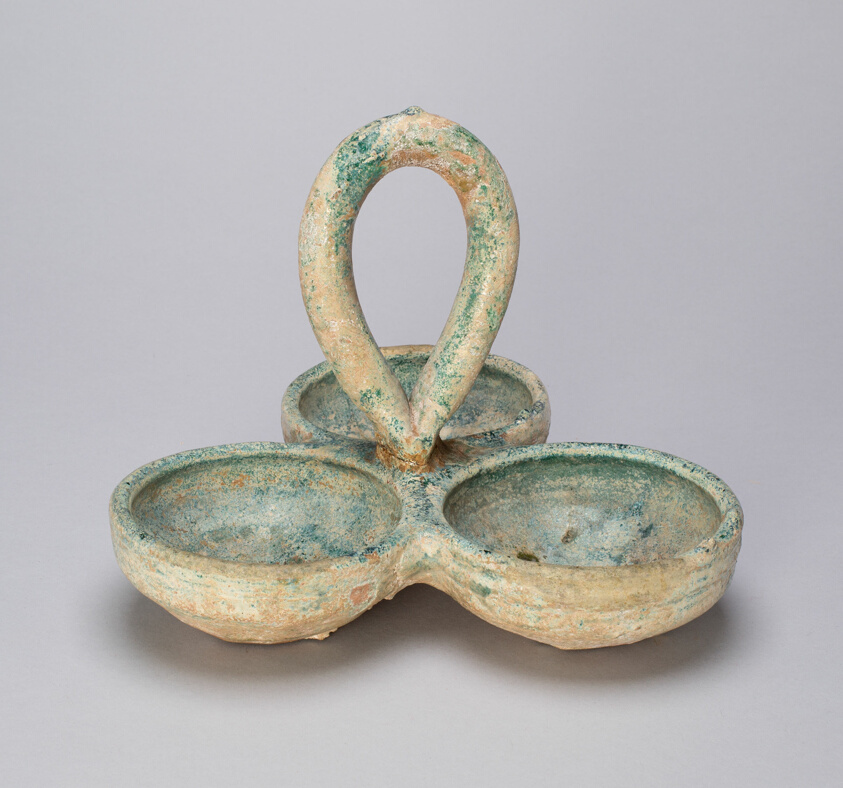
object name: Vessel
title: Three-Cupped Dish with Loop Handle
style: Chinese (culture or style)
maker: China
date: Eastern Han dynasty (A.D. 25–220), 1st century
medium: Earthenware with lead green glaze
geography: China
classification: dish (vessel); asian art; ceramics; vessel